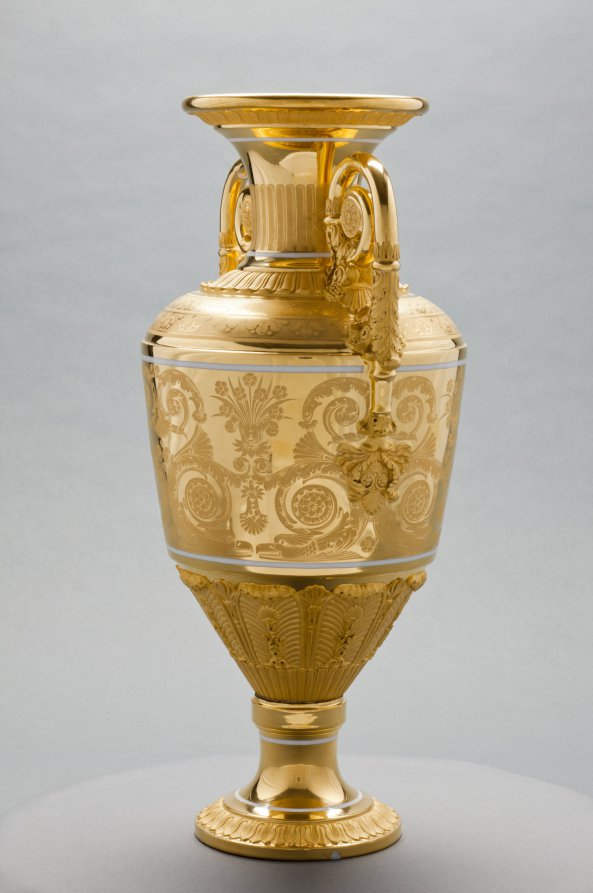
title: Vase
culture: Russia, St. Petersburg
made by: St. Petersburg Imperial Porcelain Factory (Russian)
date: c. 1820–1830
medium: gilt porcelain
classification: Ceramic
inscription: inscribed: "Moreau" in gold near lip.